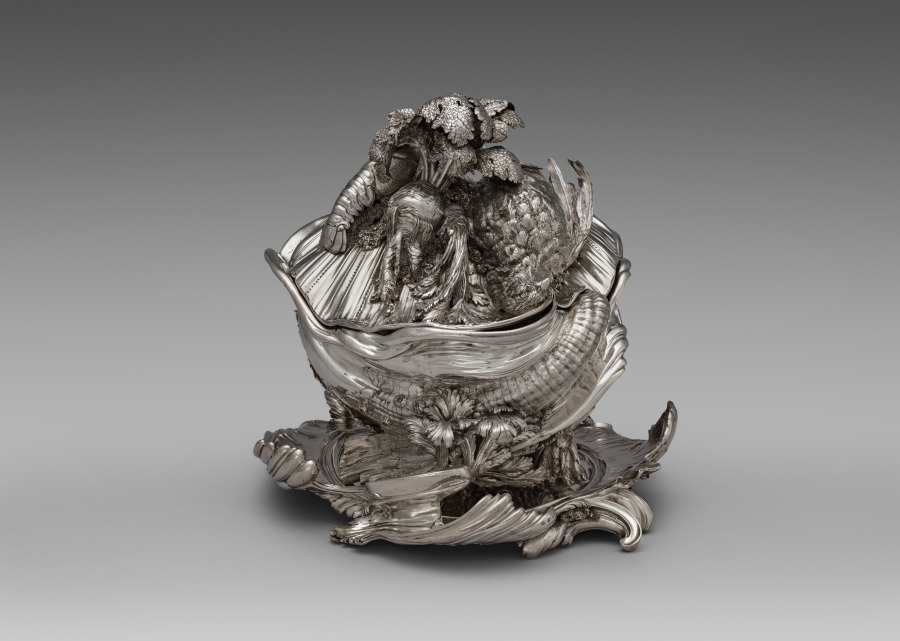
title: Covered Tureen on Stand (Pot-à-oille)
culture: France, Paris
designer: Juste-Aurèle Meissonnier (French, 1695–1750)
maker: Pierre-François Bonnestrenne (French)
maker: Henry Adnet (French, 1745)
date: 1735–38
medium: silver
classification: Silver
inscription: [Maker’s mark of Pierre−François Bonnestrenne, beneath platter; inside tureen (two marks)]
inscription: [Warden's mark for Paris, 1734−1735, beneath platter; inside tureen; inside cover]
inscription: [Charge mark of Hubert Louvet, Paris, 1732-1738, on platter border; beneath platter; beneath tureen; inside cover; inside tureen (two marks)]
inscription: [Discharge mark of Louis Robin mostly used for stamping small work, Paris 1738−1744, on platter border; beneath tureen]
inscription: [Warden's mark for Paris, 1736−1737, on platter border]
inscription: [Possibly British import mark, London, 1925, on platter border]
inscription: [Possibly mark of the British firm Charles & Richard Comyns, on platter border]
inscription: [Discharge of Louis Robin mostly used for stamping gold and silver between 1738 and 1744, beneath tureen; outside cover]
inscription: [Maker’s mark of Henry-Guillaume Adnet, inside cover]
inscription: [Two small undefined marks, inside cover]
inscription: [Under the surface of the platter the engraved signature]: “FAIT-PAR-I-A-MEISSONIER-ARCHITECTTE”; [and the weight] “673=5"; “No. [v] I 50 £ b76Sol”; [and the numbers] “A nº 1”; “A nº2”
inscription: [On tureen lip]: "MEISSONIER"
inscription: [On tureen lip]: “A nº 3”; “A nº2” [in order to place the tureen correctly on the stand]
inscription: [Numbers engraved on the stand, the tureen, and the cover to show how the piece should be assembled]: “A nº 1” [on the base of the tureen; beneath the cover; on the platter], “A nº 2” [on the platter], “A nº 3” [on the exterior rim of the tureen], “A nº4”; “A nº 5” [outside the cover], “A nº 7” [on the border of the platter]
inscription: [Two warden's marks for Paris, 1735-1736, beneath tureen]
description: This tureen exemplifies the French Rococo style, an artistic movement celebrating naturalistic forms that developed in Paris during the early 1700s. In contrast to classical, controlled symmetry, Rococo forms morph, twist, and spill into the space around them. Meissonnier embellished this tureen in a picturesque arrangement of vegetables and creatures, transforming a utilitarian object into a decadent display of wealth and abundance. This masterpiece comes from a set of two tureens commissioned by the English Duke of Kingston during an extended stay in Paris in the 1730s.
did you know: The langoustine, pigeon, and vegetables were cast using real examples giving the silver copies lifelike detail and appearance.